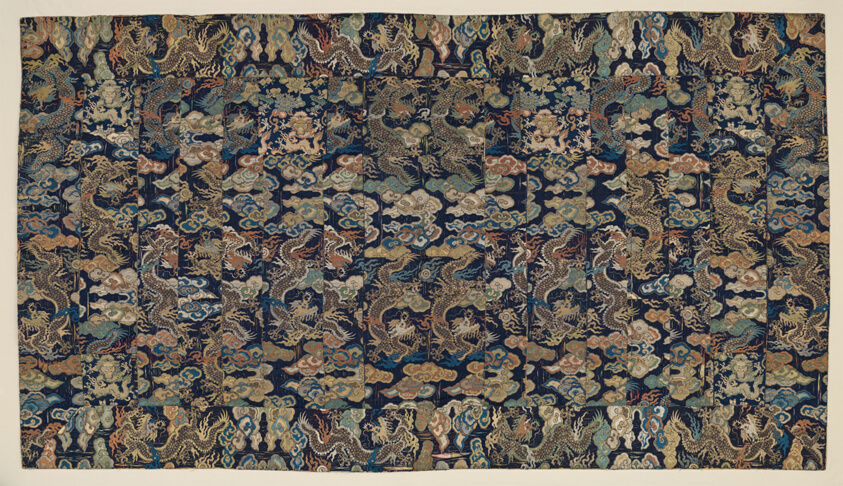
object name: Textile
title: Kesa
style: edo (japanese period)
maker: Japan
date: 1650/1700, Edo period (1615–1868)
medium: Silk and gilt-paper strip; twill weave with secondary binding warp and supplementary patterning wefts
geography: Japan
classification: textile; weaving; liturgical - buddhist